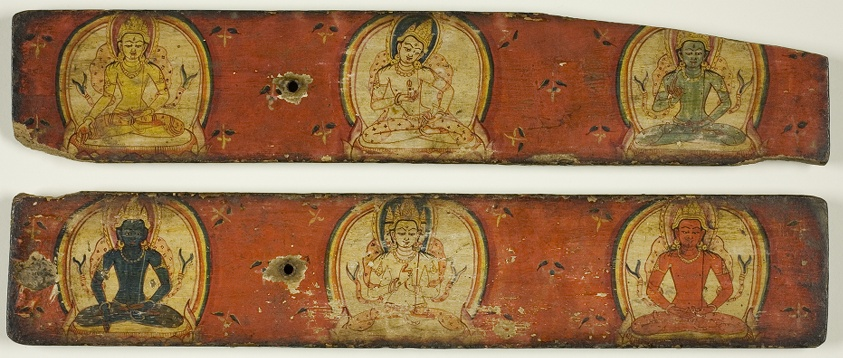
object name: Religious/Ritual Object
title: One of a Pair of Manuscript Covers of the Five Transcendant Buddhas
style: Himalayan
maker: Nepal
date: 12th century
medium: Pigments and metallic paint on wood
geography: Nepal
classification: ritual objects